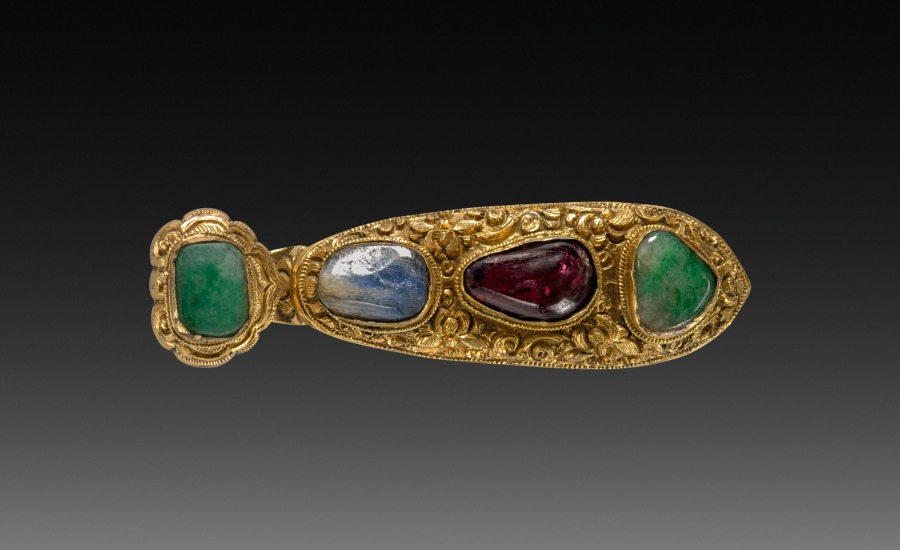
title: Buckle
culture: China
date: 1900s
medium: gilt brass, engraved and set with semiprecious stones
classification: Jewelry